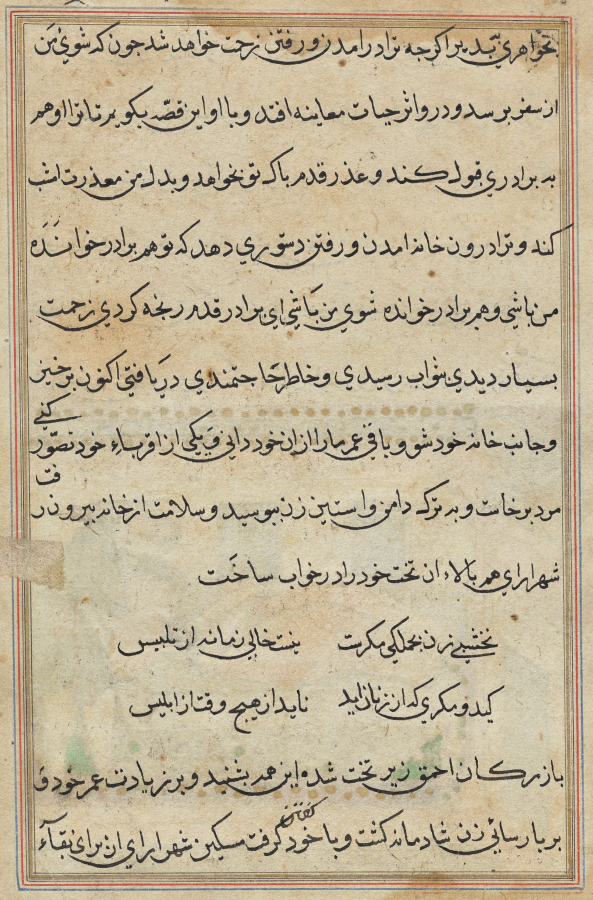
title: Page from Tales of a Parrot (Tuti-nama): text page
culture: Mughal India, court of Akbar (reigned 1556–1605)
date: c. 1560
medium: gum tempera, ink, and gold on paper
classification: Painting